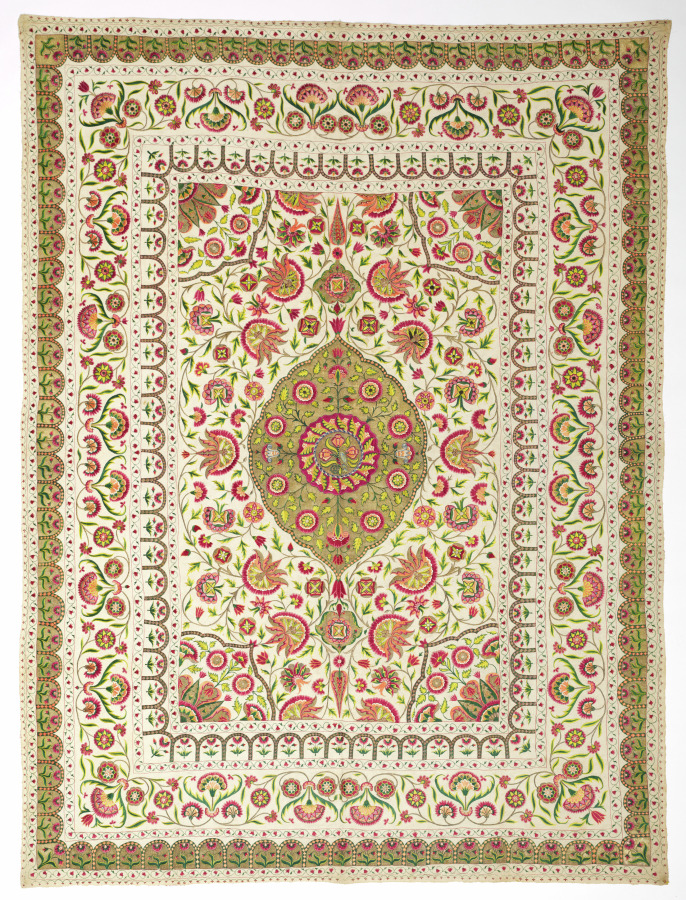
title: Spread with floral medallion pattern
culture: Mughal India, Deccan, probably Goa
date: 1700s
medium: Cotton: plain weave, quilted; silk and gilt-metal thread: embroidery, couched laid work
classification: Embroidery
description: This textile could have been used as a covering for seating on the floor or as a bedspread in either an Indian or European setting. In any case, it was not meant to be walked on. Its material and imagery testify to flourishing international relationships. The arabesque designs, consisting of swirling vines with large and small flowers, recall a radiant paradise and have roots in Persian, Chinese, and Mediterranean sources. The use of gold-wrapped thread had been widespread in Spain and Portugal before it was adopted in India, probably first in Goa, a Portuguese colony on the southwestern coast of India from 1510 to 1961. The vibrant colors are distinctive to this region of India.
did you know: A small blue and yellow bird perches at the center of the otherwise solely floral design.